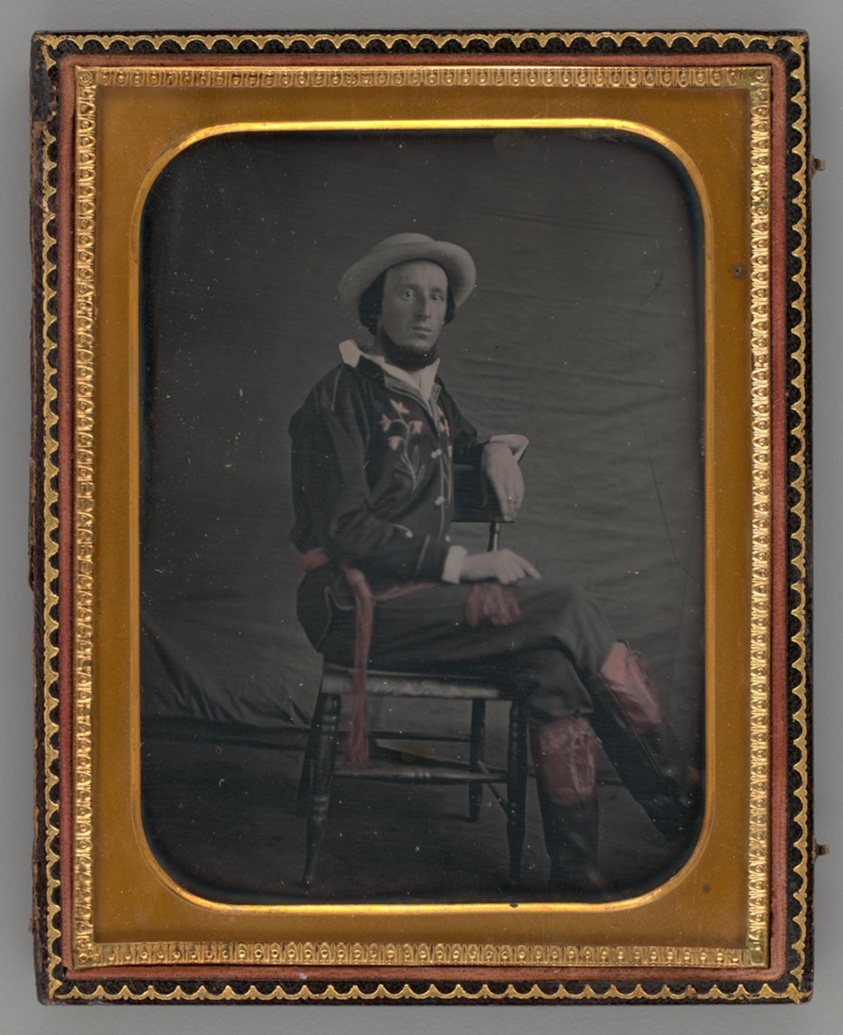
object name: Photograph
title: Untitled (Portrait of Seated Man)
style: 19th century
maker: Unknown maker; American, 19th century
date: 1853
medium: Daguerreotype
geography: United States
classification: portrait; daguerreotype; portrait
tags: lundberg collection, gold mining, gold rush, Male, portraits, portraits: male subject